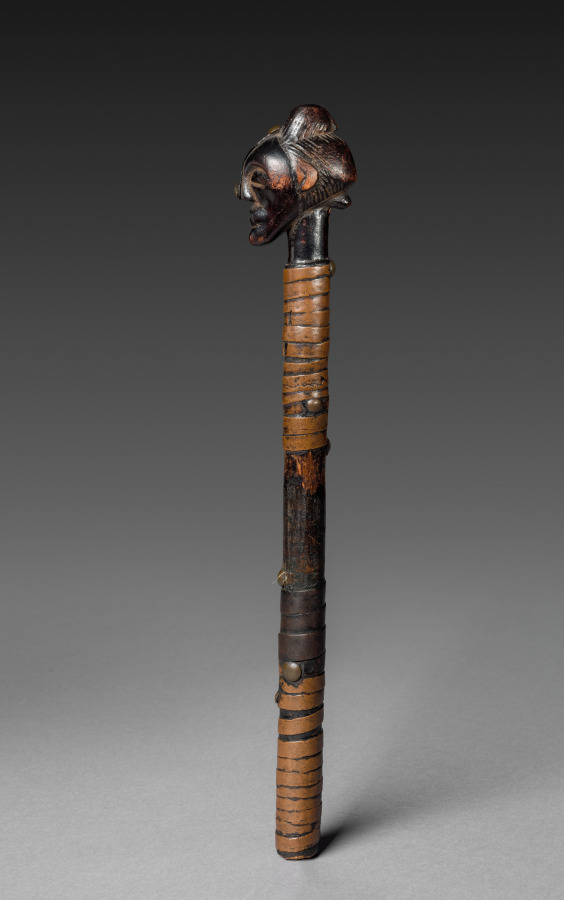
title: Fragment of a Staff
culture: Africa, Central Africa, Democratic Republic of the Congo, Kalundwe, unknown maker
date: late 1800s–early 1900s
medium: Wood, copper alloy, upholstery studs, and iron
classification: Implements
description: Though modest in scale and fragmentary in that its blade is missing, this is perhaps one of the finest surviving examples of a sculptural object in the little-known style of the Kalundwe people. It represents a poorly documented culture's artistic style that sits between the Songye to the west and the Luba to the east. Showing surface traces of continuous manipulation, the shaft of this short staff is entirely wrapped with a copper sheet, a common feature of rank emblems. Originally, it would have had an iron blade projecting from its mouth. However, rather than serving as a functional tool for carving, it would be hung over the shoulder to signal the high rank of its owner, be it a chief, another dignitary, or even a sculptor.